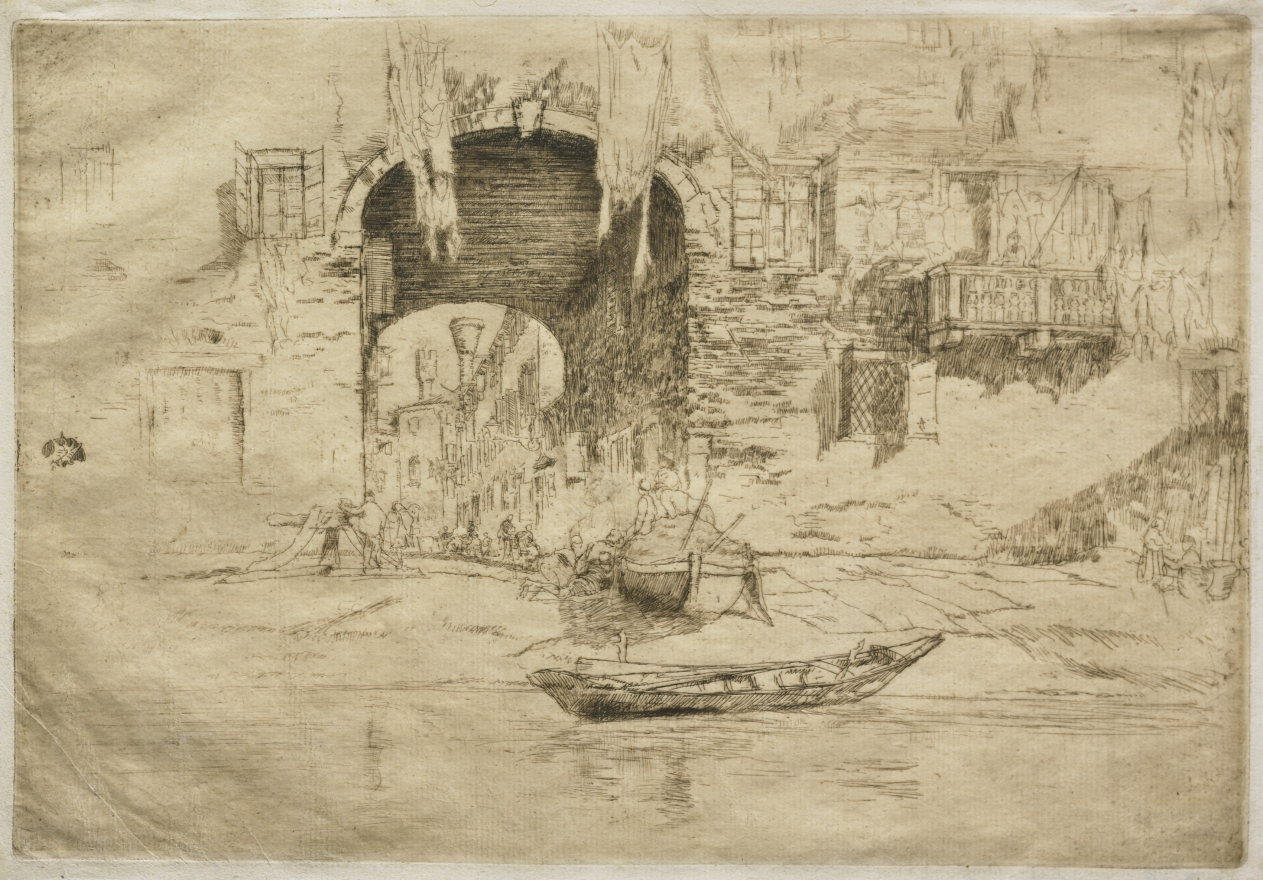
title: San Biagio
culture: America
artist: James McNeill Whistler (American, 1834–1903)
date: 1880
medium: etching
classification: Print